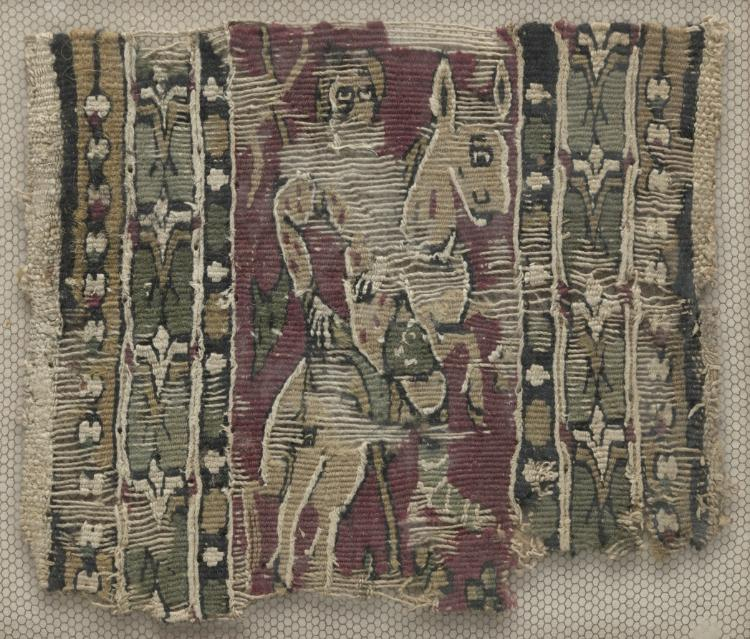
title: Fragment of a Clavus with Man on Horseback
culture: Egypt, 8th century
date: 700s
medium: tapestry; linen and wool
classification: Textile